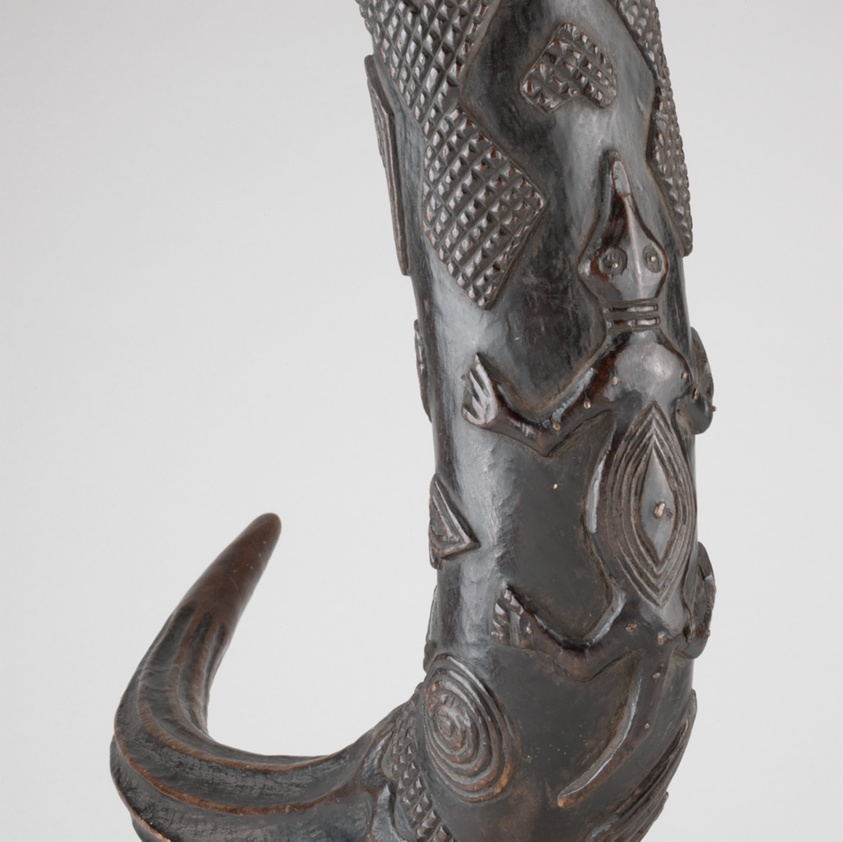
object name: Vessel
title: Horn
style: kuba (democratic republic of congo style, Arts of Africa, Central Africa, african Art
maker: Kuba; Kasai region, Democratic Republic of the Congo; Central Africa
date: Late 19th-early 20th century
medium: Wood, copper alloy, and iron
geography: Democratic Republic of the Congo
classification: drinking vessel; arts of Africa; vessel; african art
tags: drinking, animals, Buffalo, abstract figures, geometric, status